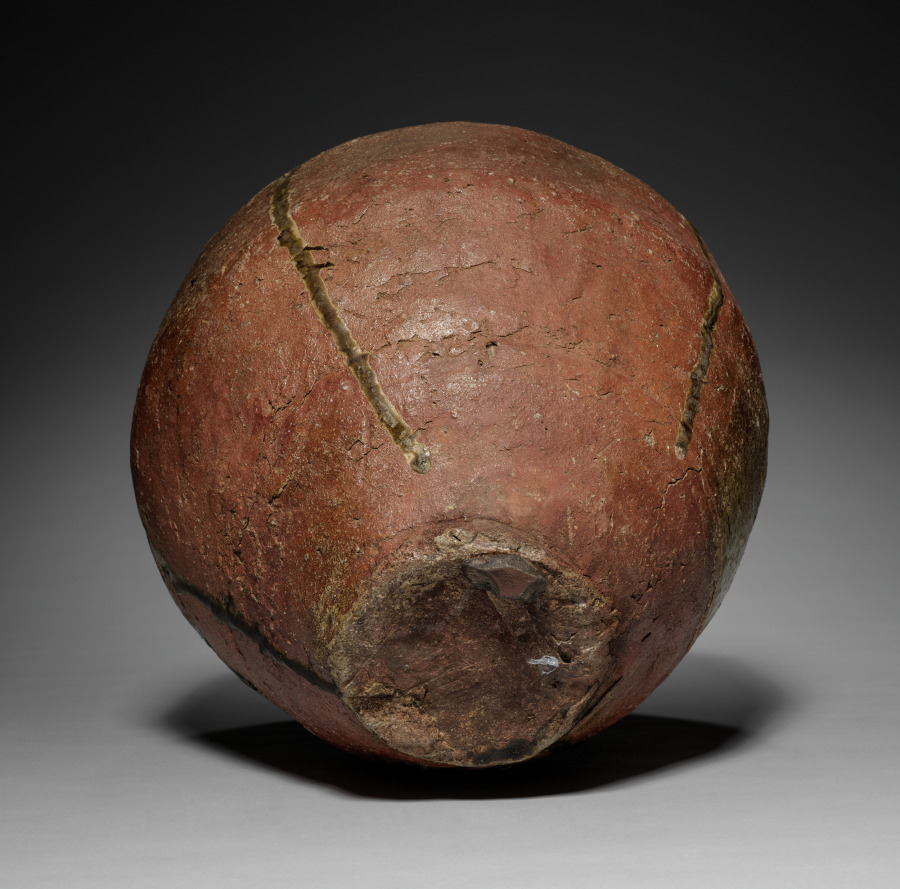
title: Large Jar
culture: Japan, Muromachi period (1392–1573)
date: 1400s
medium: stoneware with natural ash glaze (Shigaraki ware)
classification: Ceramic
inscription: Box inscription (front): 「不明」壺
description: The orange color of this jar comes from iron in the clay. Natural ash glaze settled on the vessel during firing. Originally intended for grain storage, rustic containers like this one were also prized by tea enthusiasts, who appreciated the uncalculated beauty of the glaze and the asymmetry of these humble objects. They used them to store tea leaves.